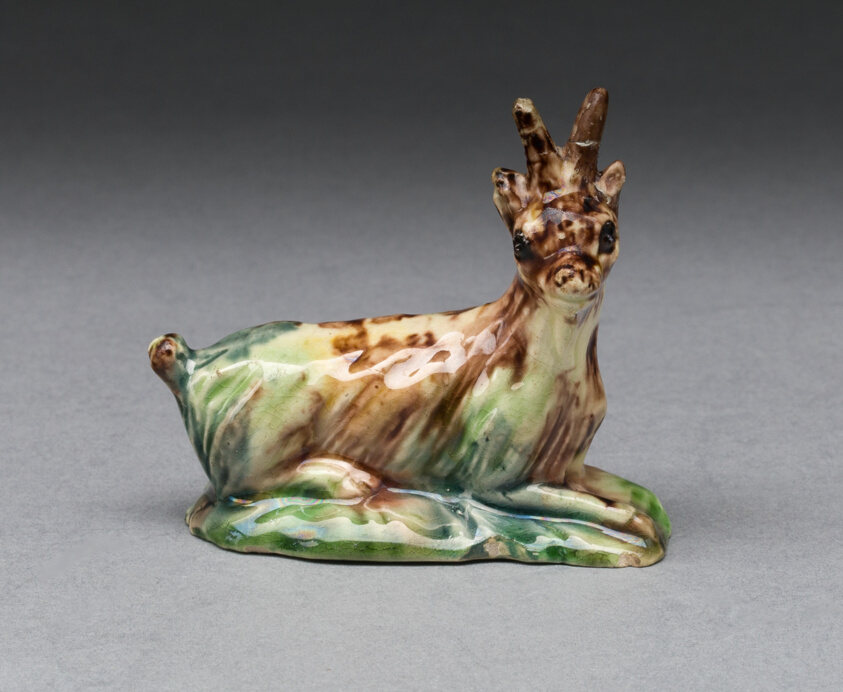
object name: Ceramics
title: Goat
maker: England, Staffordshire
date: 1760/70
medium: Lead-glazed earthenware (creamware)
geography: Staffordshire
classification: earthenware; european decorative arts; ceramics; creamware; lead-glazed earthenware